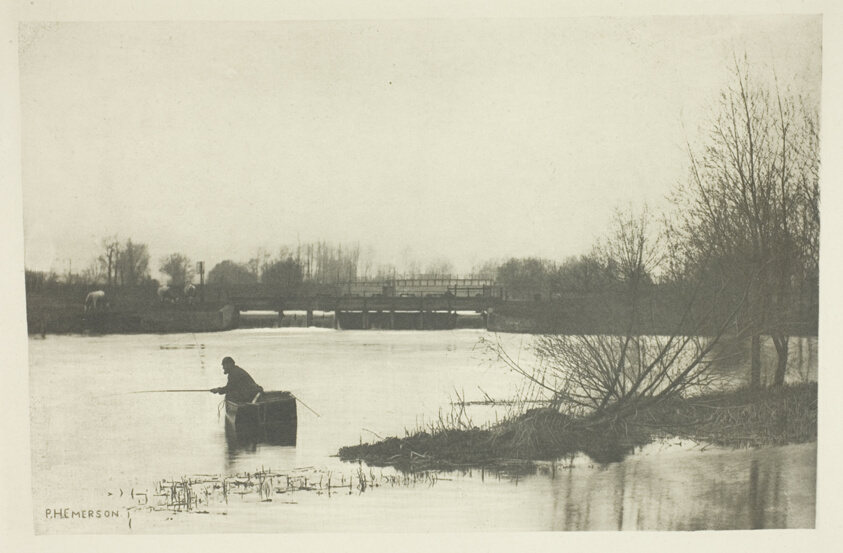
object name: Photograph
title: Field's Weir, Near Rye House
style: 19th century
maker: Peter Henry Emerson (English, born Cuba, 1856–1936)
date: 1888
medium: Photogravure, plate XVII from the album "The Compleat Angler or the Contemplative Man's Recreation, Volume I" (1888)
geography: England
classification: photogravure; photomechanical process; photography; photograph